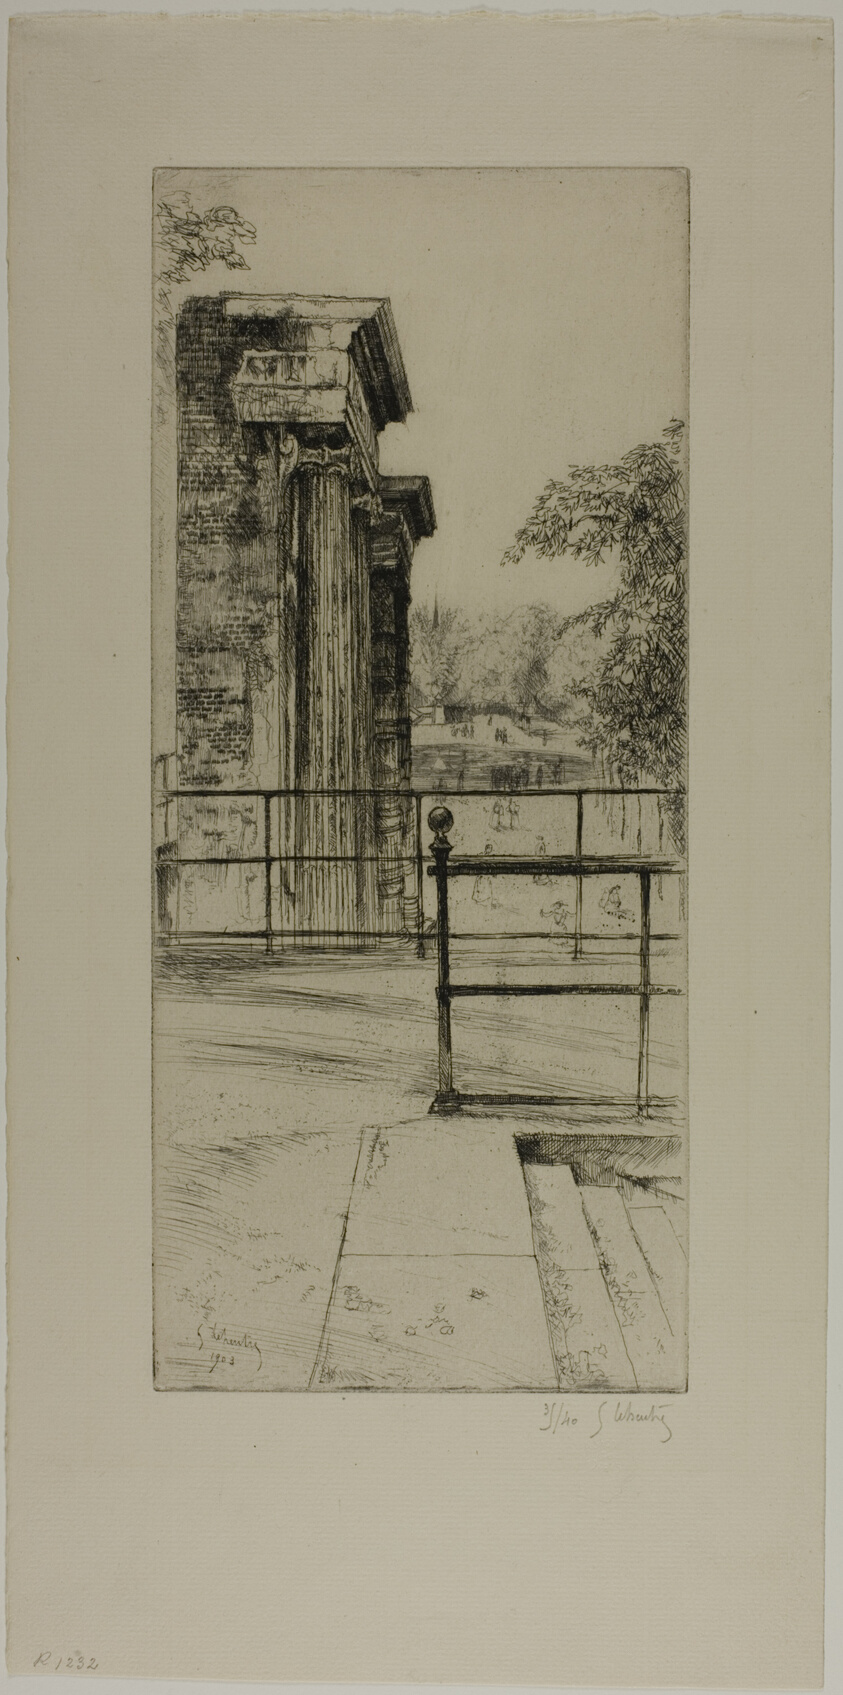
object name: Print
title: Ruins of the Old Tuileries, Paris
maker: Gustave Leheutre (French, 1861-1932)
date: 1903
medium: Etching and plate tone on ivory laid paper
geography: France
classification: etching; print; prints and drawing